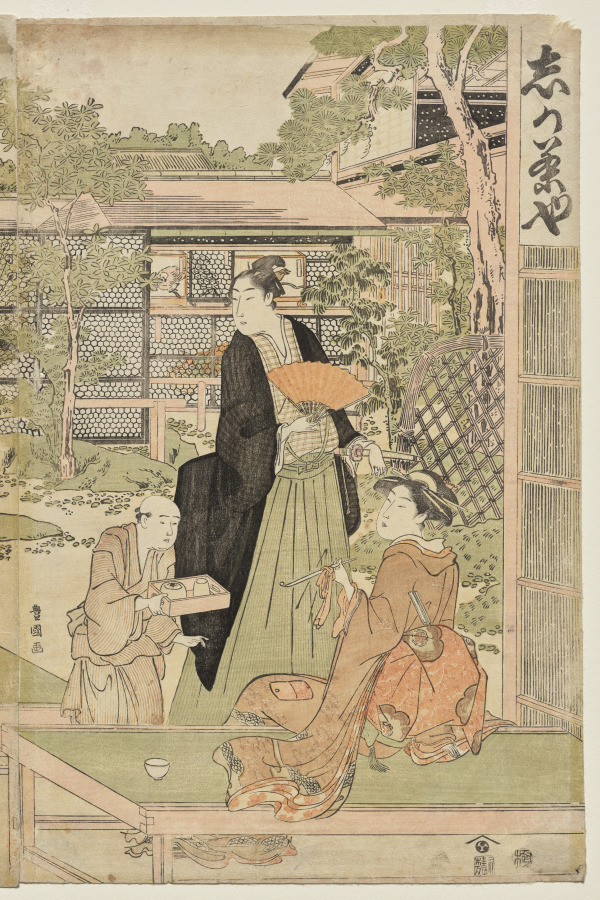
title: The Shika Teahouse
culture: Japan, Edo period (1615–1868)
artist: Utagawa Toyokuni (Japanese, 1769–1825)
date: early 1790s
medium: One of a triptych of color woodblock prints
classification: Print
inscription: Signature: Toyokuni ga Publisher: Nishimuraya Yohachi (Eiju han, emblem) Censorship Seal: kiwame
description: Exotic birds and tobacco—Western imports—feature in this composition. Peacocks and parrots were brought to Japan by Dutch traders in the 1700s. Many of the visitors to this teahouse, which specialized in displays of foreign birds, admire the unusual fowl while sipping tea and smoking long pipes. The birds have attracted curious courtesans, entertainers, samurai, merchants and their wives, and even a Buddhist monk.